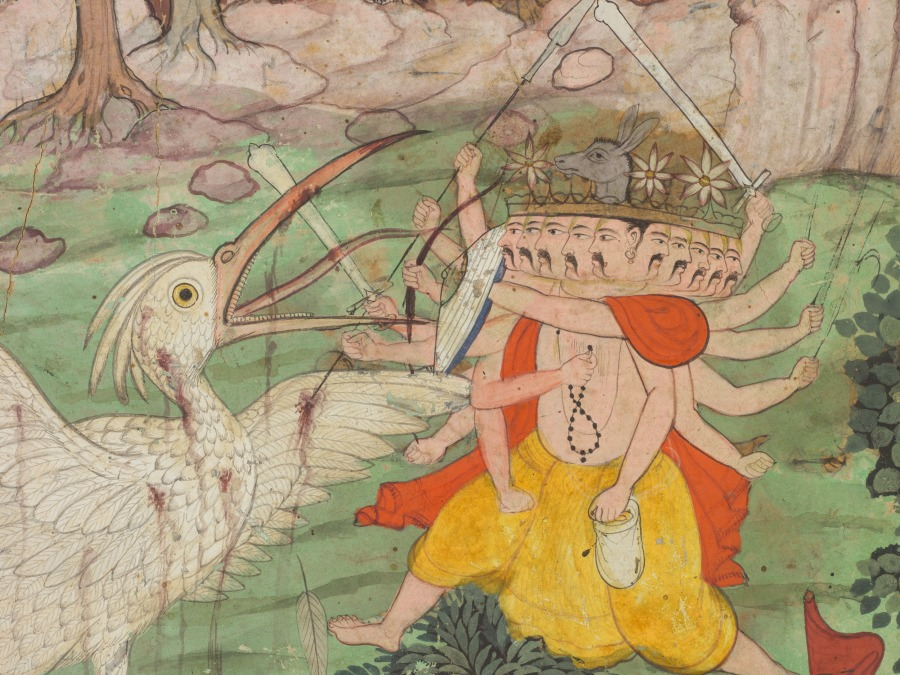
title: Battle of Ravana and Jatayu, from Chapters 50 and 51 of the Aranya Kanda (Book of the Forest) of Valmiki's Ramayana (Rama’s Journey); folio from the "Burnt" Ramayana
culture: Central India, Bundelkhand Region, Madhya Pradesh, Rajput Kingdom of Datia, Court of Raja Bir Singh Deo (reigned 1605–27)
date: c. 1605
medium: Gum tempera and ink on paper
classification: Painting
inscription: [[verso, text of Battle of Ravana and Jatayu: Sanskrit text in devanagari script]]: Now [an extraordinary fight ensued] there between the vulture [Jatayu] and the demon [Ravana], quite violent [as if] between two great, winged mountains. With sharp [arrows, broad-headed and made of iron] and spears too, [that immensely powerful demon] forcefully showered [the King of Vultures]. In the course of battle that vulture, Jatayu, Lord of Birds, [confronted] that mass of arrows [the weapons of Ravana], and then he, [that vulture], like a mountain shaken about [fell backward], and with his talons dragged him [Ravana] down, overcome by anger. And that immensely powerful Lord of Birds instantly made his [Ravana’s] limbs bloodied with his sharply taloned feet. Then, Ravana [in a rage] pierced the King of Vultures in battle with [three direct arrows], frightful and swift. And after, he took up his other dreaded arrows on reserve, [with their arrowheads straight]. Each one resembled Death’s staff, [crushing insolence in] enemies. That immensely powerful, mighty demon pierced the [the bird’s body] with [perfectly sharp], golden-feathered arrows . . . . Without even taking those arrows into account, that enraged bird launched himself at Ravana. [Flying upward and then rushing down], raising his wings overhead, he battered [Ravana] with those feathered limbs. [Then, that Lord of Birds, energy blazing, splintered] with his claws [Ravana’s] bow and arrows, adorned with gems and pearls. And that Lord of Birds [splintered] also those very arrows shot [by Ravana]. Then, that immensely powerful [Indra of Birds] [over and over again, pecked at Ravana’s divine crown] made of gold and glittering with every jewel, and [being full of rage, hurled] it through the sky. Like the sun’s halo, it glistened as it sank. [That bird] struck down the asses, with their golden chest armor and devilish [pishacha] faces, and yanking them about, [instantly deprived them of breath]. He [smashed] the fearsomely huge chariot, which flies upon a wish, ornamented from wheel to pole, [each part arrayed in gold] and jewels. Tearing the charioteer from the chariot, [that Lord of Birds], with talons [that seemed like elephant goads, quickly shred him], then tossed him away. Ravana, his bow broken, chariot done with, [his asses killed, his charioteer slain,] fell to the ground, holding Vaidehi [in the crook of his arm]. Seeing Ravana fallen to the ground, his chariot smashed, all the other creatures celebrated the King of Vultures, crying—“Well done, well done!” [And the gods and sages] were amazed when they saw [Ravana, the destroyer of pride among enemy armies,] who was never defeated [by the gods and demons] on the front lines, defeated now [by the best of birds]. Then the denizens of the heavens praised that best of birds—“O excellent one, you have accomplished a difficult task!” The venerable King of Birds, who was extolled, became resolute and once again endured battle.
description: The vulture Jatayu, Lord of the Birds, his beak agape, loses feathers and dark red blood in his desperate fight to save Sita from her kidnapper, the ten-headed Ravana. Since this painting was damaged by fire in India decades ago, Sita is barely visible now at the bottom right corner, in Ravana’s donkey-led chariot. Her expression is pensive, as she awaits her fate. In adherence to the Ramayana text written on the back of the painting, the donkeys were the first victims in the battle that will claim Jatayu’s life.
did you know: This page is from a series known as the “Burnt Ramayana,” since it was damaged by fire.